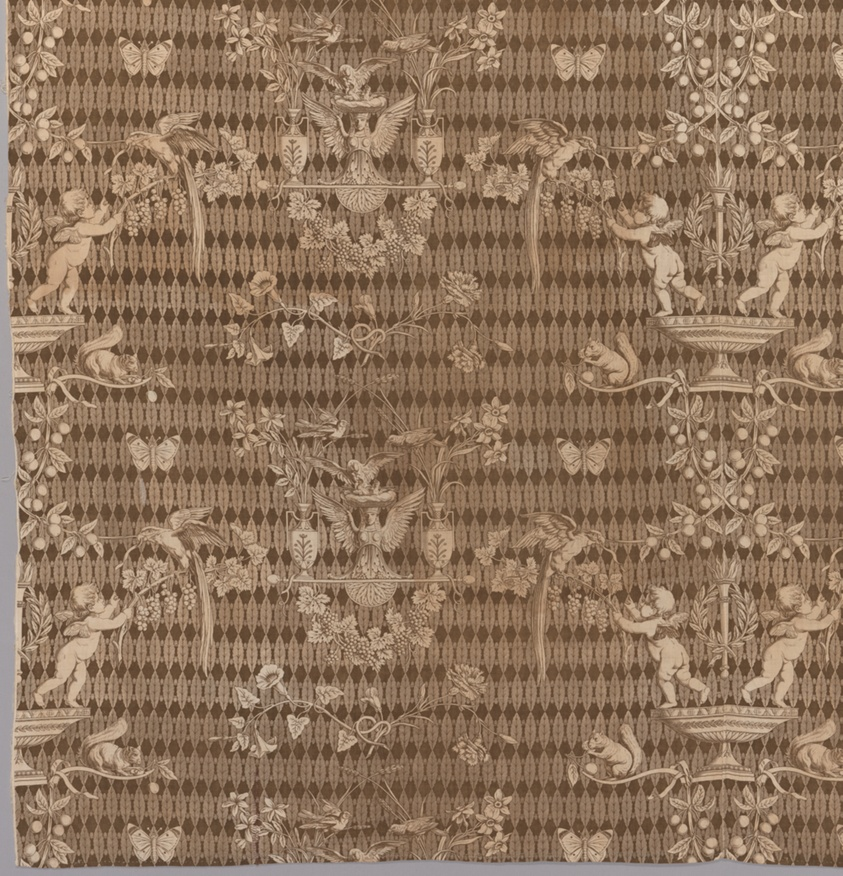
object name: Textile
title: “Birds and Squirrels” Furnishing Fabric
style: Neoclassicism, jouy-en-Josas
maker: Designed by Jean Baptiste Huet (French, 1745–1811); France, Jouy-en-Josas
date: 1806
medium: Cotton; roller printed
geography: France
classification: printed textile; textile; furnishing textile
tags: birds, animals